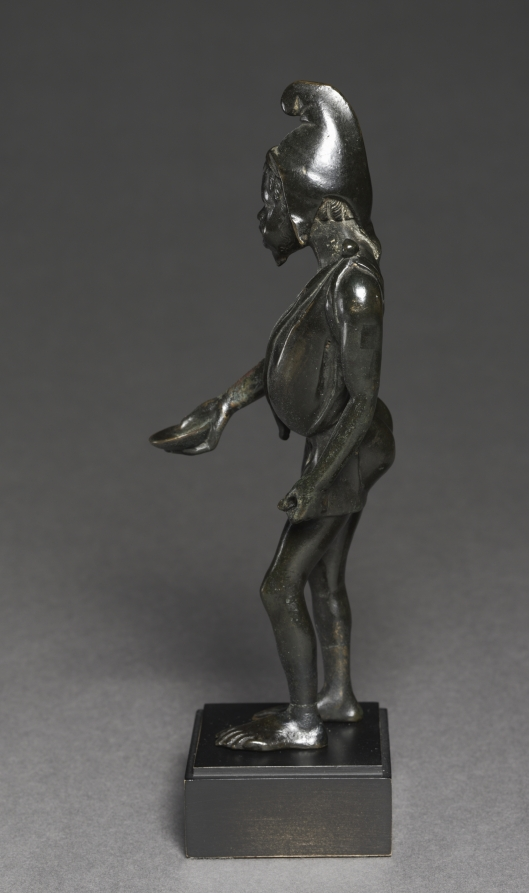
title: Statuette of a Black African Person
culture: Greece, Greco-Roman Period, late Ptolemaic Dynasty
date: 100–50 BCE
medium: bronze, solid cast, with silver and copper inlays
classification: Sculpture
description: Characterized as a Black African person by his hair, facial features, and unusually dark patina, this figure wears a non-Greek type of hat and a simple garment associated with lower classes. His stooped posture suggests that he may have a physical disability, something rarely depicted in Greek art. His right foot and right hand (with bowl) are modern restorations done before the statuette came to Cleveland, perhaps in the 1800s.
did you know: The intentionally dark patina contrasts with the inlaid silver eyes and copper lips.